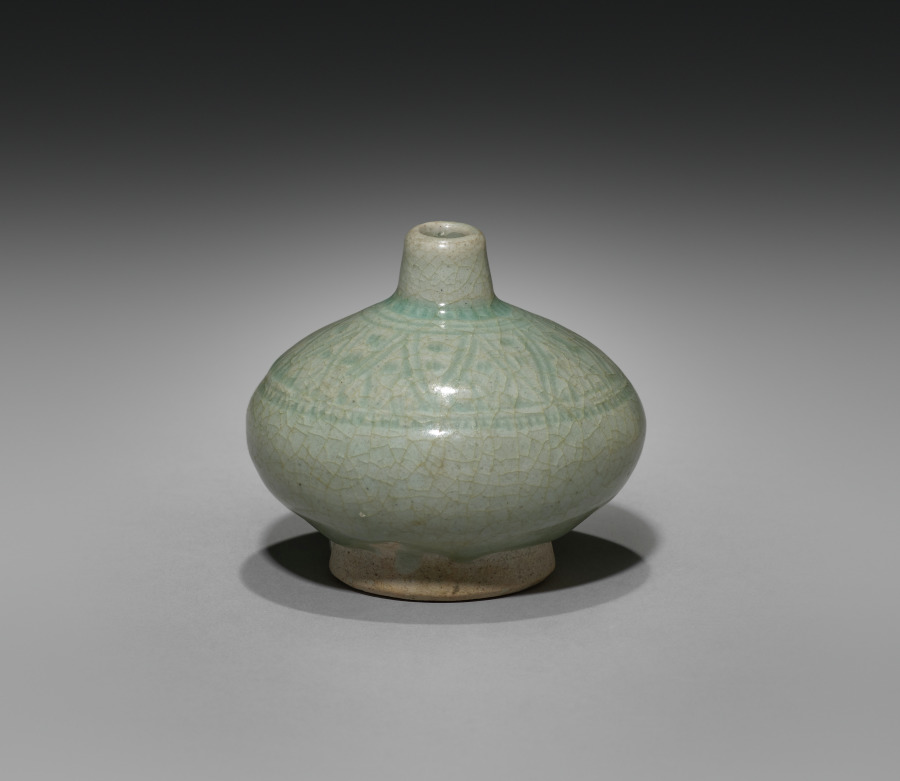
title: Small Jar: Sawankhalok Ware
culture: Thailand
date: 1300s–1400s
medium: porcelain with celadon glaze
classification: Ceramic